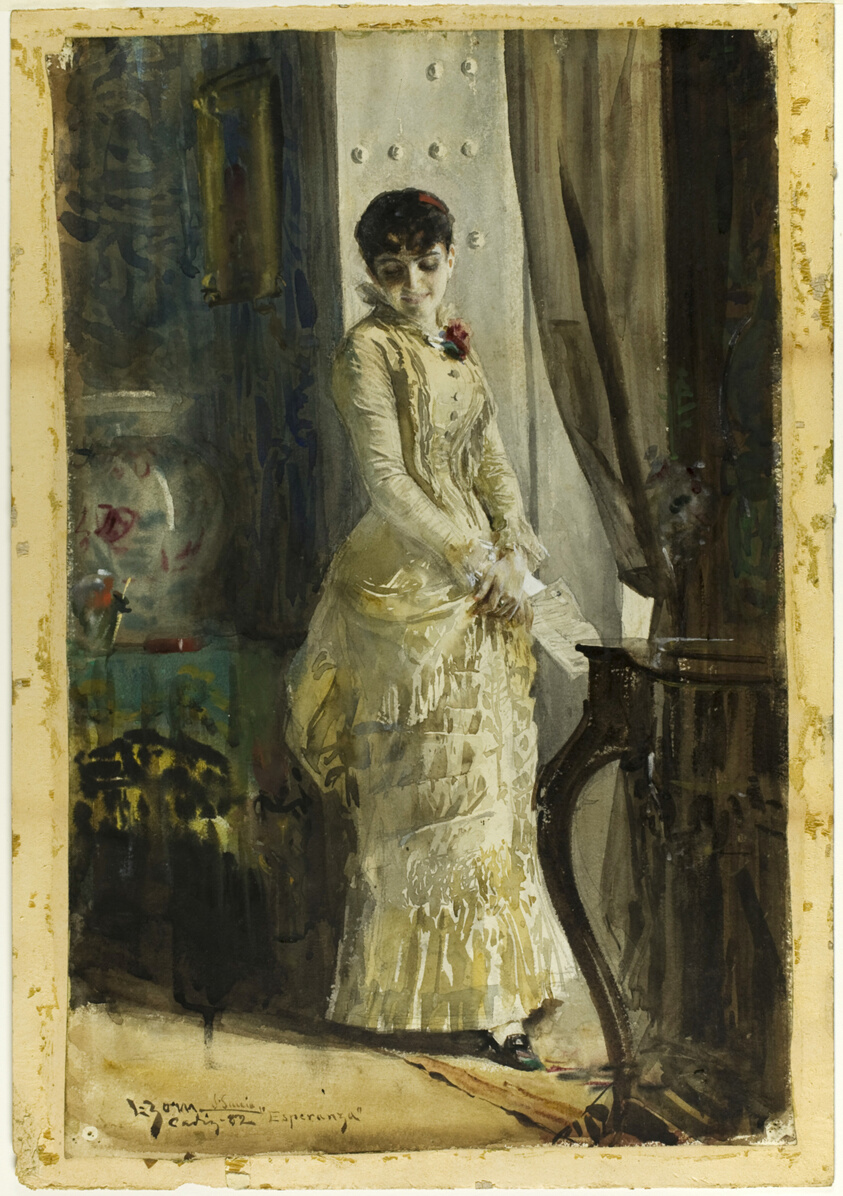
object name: Drawing and Watercolor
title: Esperanza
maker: Anders Zorn (Swedish, 1860-1920)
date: 1882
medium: Watercolor, over traces of graphite, on paper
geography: Sweden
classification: drawings (visual works); prints and drawing